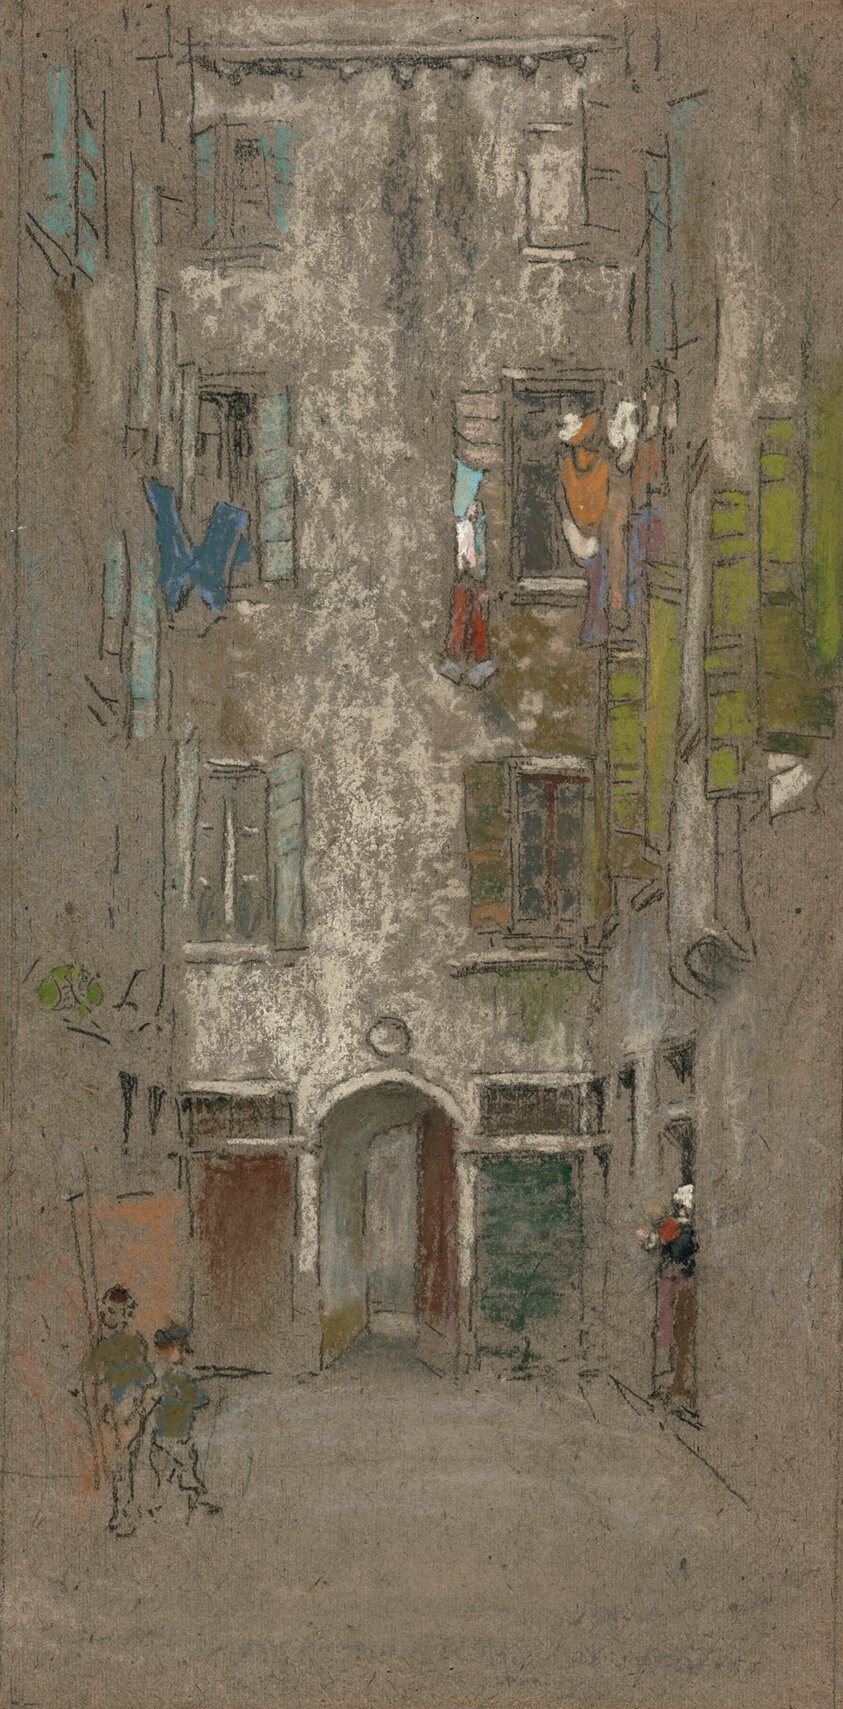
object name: Drawing and Watercolor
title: Corte del Paradiso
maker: James McNeill Whistler (American, 1834-1903)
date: 1880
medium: Pastel and black chalk on brown wove paper with fibrous inclusions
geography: United States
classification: pastel; drawings (visual works); prints and drawing; paper